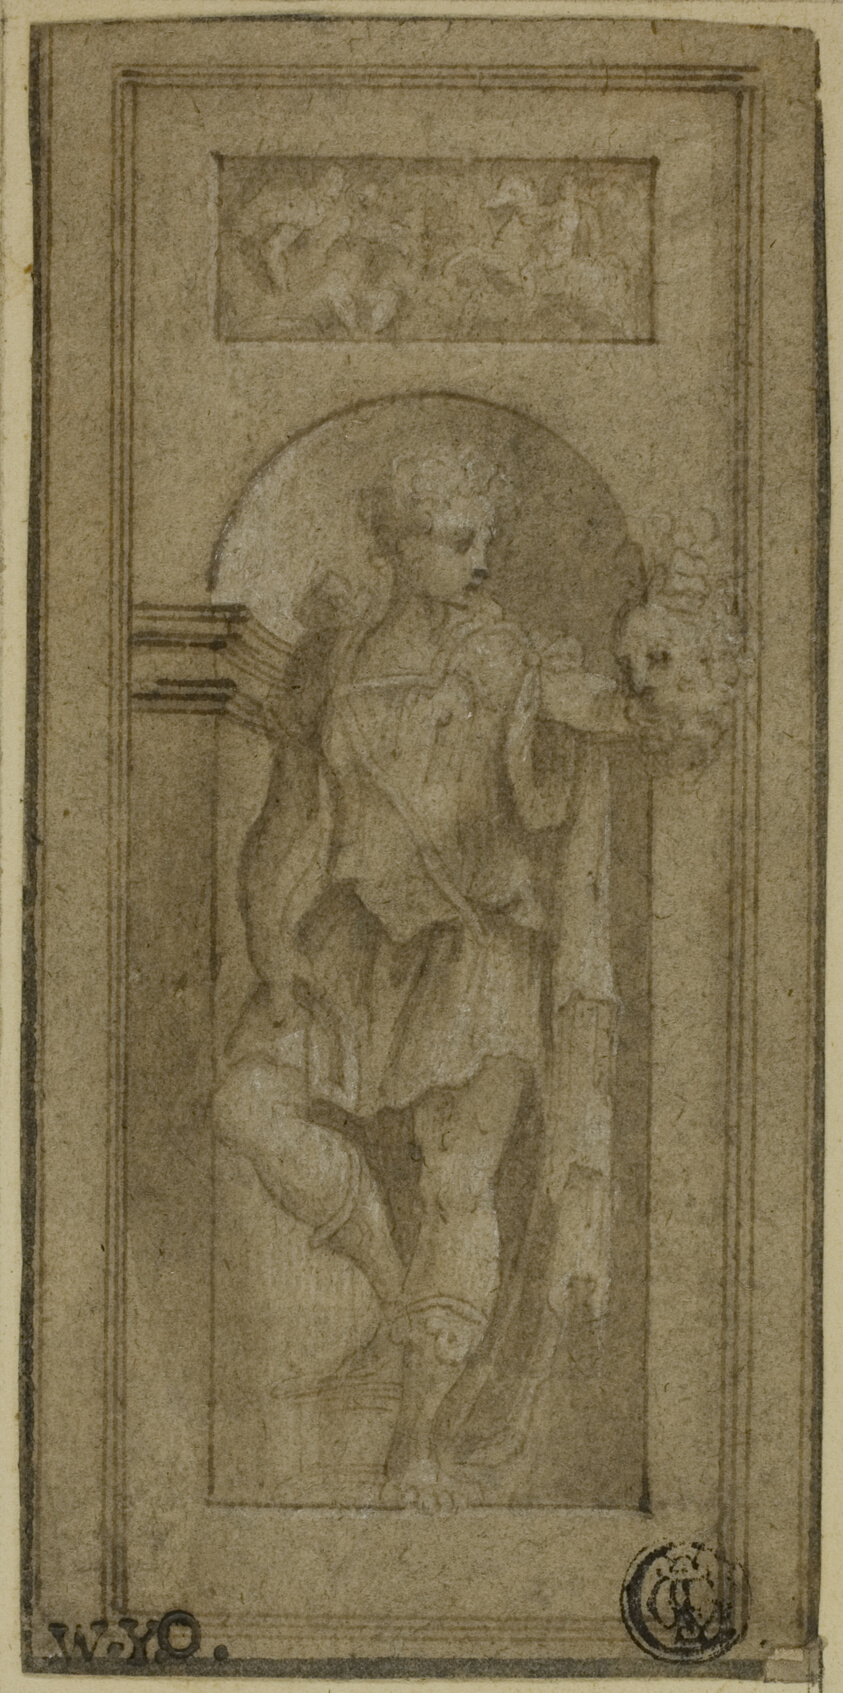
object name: Drawing and Watercolor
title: Niche Statue of David with the Head of Goliath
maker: Possibly Francesco de'Rossi, called Salviati (Italian, 1510-1563); or Giulio Campi (Italian, c. 1508-1573); or Jacopo Sansovino (Italian, 1486-1570)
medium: Pen and brown ink with brush and brown wash, heightened with traces of white gouache, on buff laid paper, laid down on cream card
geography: Italy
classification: ink with wash; drawings (visual works); prints and drawing